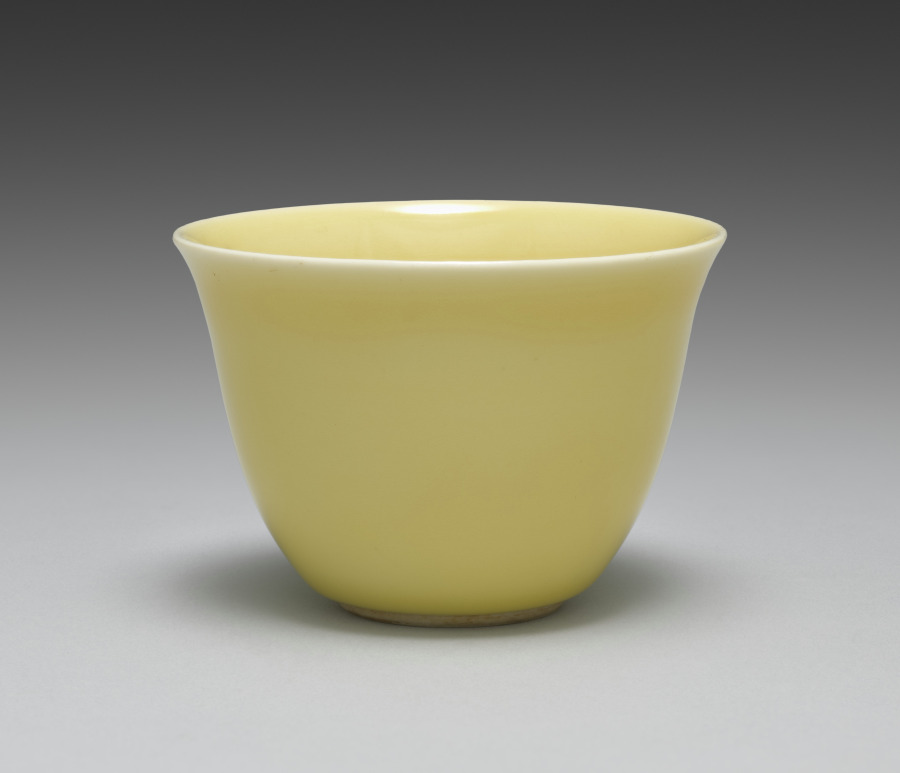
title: Cup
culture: Japan, Taishō period (1912–26) or Shōwa period (1926–89)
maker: Seifū Yohei IV (Japanese, 1872–1951)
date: 1914–46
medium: porcelain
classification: Ceramic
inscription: 清風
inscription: 清風造 【印】成山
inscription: 清風盧人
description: Like his father, Yohei IV also produced works with red or yellow monochrome glazes. His yellow-glazed works include this set of five drinking cups, a pair of sake pourers CMA 2022.216, and a sweets bowl molded into the shape of a chrysanthemum CMA 2022.218.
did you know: Seifū Yohei IV learned the ceramics industry from his father and painting from Tanomura Shosai.